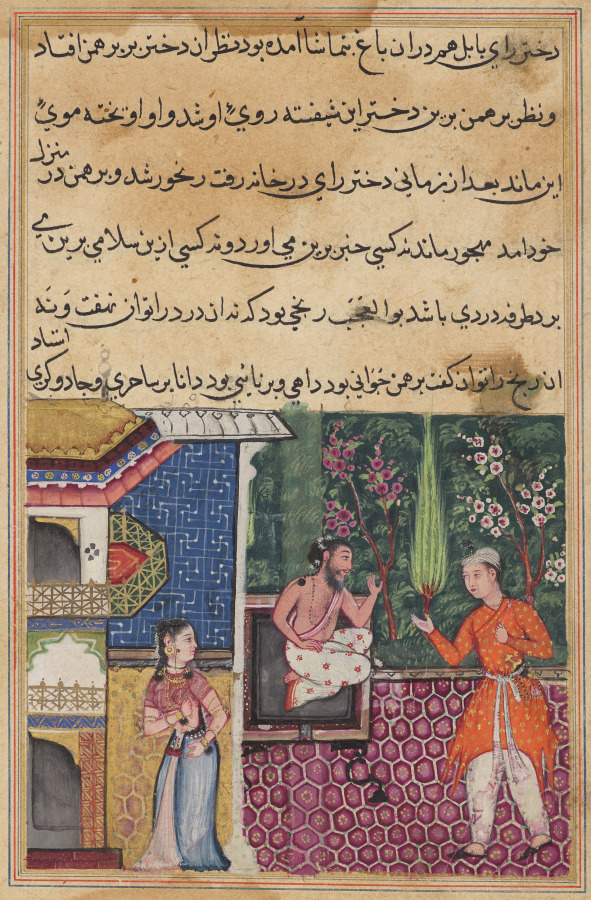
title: The Brahman gives an account of his falling in love with the king of Babylon’s daughter to his friend, the magician, from a Tuti-nama (Tales of a Parrot): Thirty-fifth Night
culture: Mughal India, court of Akbar (reigned 1556–1605)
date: c. 1560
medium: gum tempera, ink, and gold on paper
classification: Painting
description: The figure in orange is a magician addressing a seated Brahman—a member of India’s Hindu priestly class—who has come to him for help. He and the princess of Babylon have fallen in love and want to be together, but she is sequestered in the palace harem. The magician transformed the Brahman into a woman, shown at left, walking toward the palace. This is an example of continuous narration, in which two scenes are depicted in the same picture plane. The garden with flowering trees in the background evokes the setting where the Brahman and the princess met and fell in love.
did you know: Brahmans wear a sacred thread across their upper bodies, over the left shoulder and under the right arm.